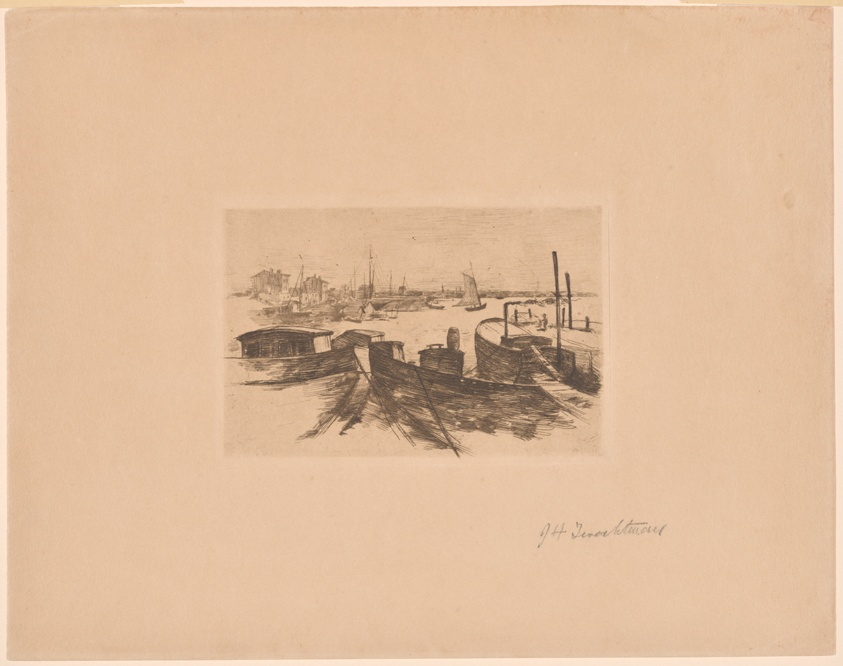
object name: Print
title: Harbor with Barges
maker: John Henry Twachtman (American, 1853-1902)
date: 1879-70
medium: Etching in brown on tan wove paper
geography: United States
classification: prints and drawing; paper; print; etching